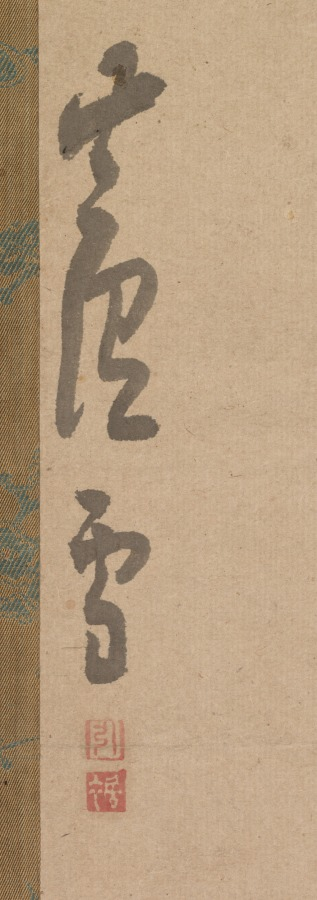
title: Mountains and Distant Boats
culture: Japan, Edo period (1615–1868)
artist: Nagasawa Rosetsu (Japanese, 1754–1799)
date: late 1700s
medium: hanging scroll; ink and slight color on paper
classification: Painting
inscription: Signed: 蘆雪; Sealed: 引裾